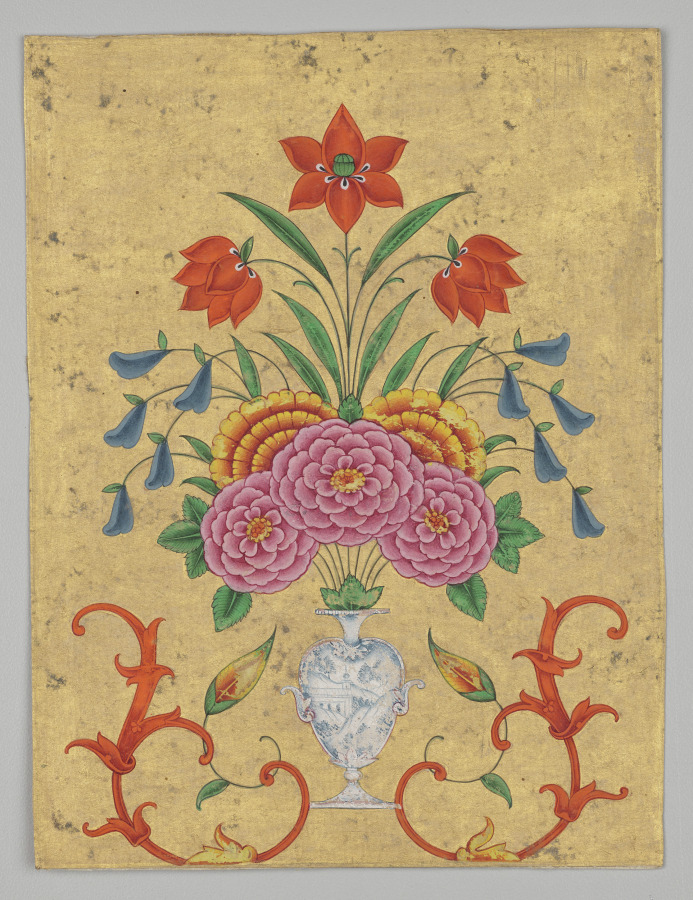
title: Vase with flower arrangement and scrollwork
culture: Mughal India, Lucknow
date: c. 1750–1800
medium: Gum tempera and gold on paper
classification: Painting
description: The symmetry of the floral arrangement emerging from the blue-and-white porcelain vase reveals an idealized vision. The overflowing vase is among the most ancient motifs in Indian art, used to convey the concept of abundance. This image, made for an elite patron of northern India, implies the prosperity that has accrued from international connections. The vase, painted with a European-style landscape, is of the type that was made in China for export to Europe. The scrolling ornament on either side may be ultimately derived from Persian motifs, but reworked into a European style, painted by Indian artists.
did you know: The blue bell-shaped flowers may be neelakurinji, which bloom once every twelve years.